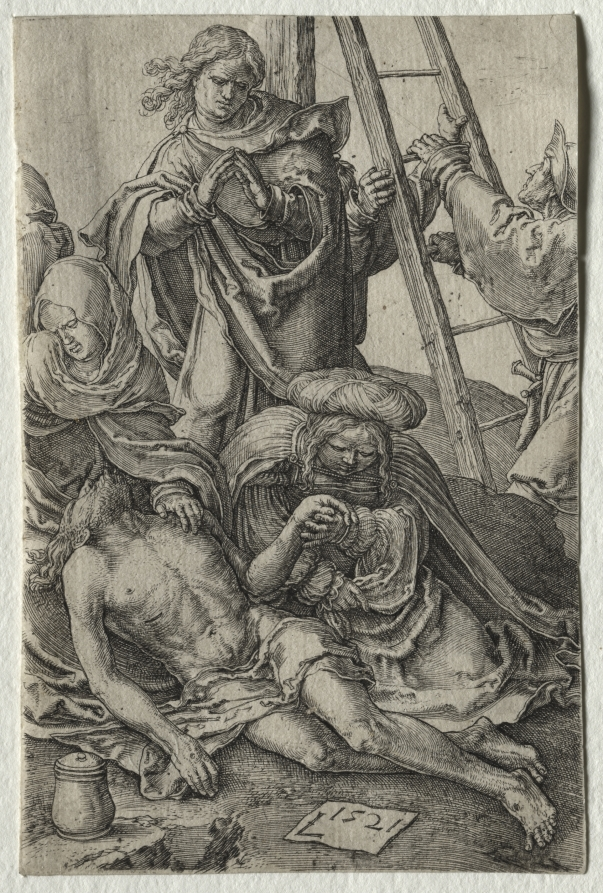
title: The Passion: Descent from the Cross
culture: Netherlands, 16th century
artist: Lucas van Leyden (Netherlandish, 1494–about 1533)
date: 1521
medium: engraving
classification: Print